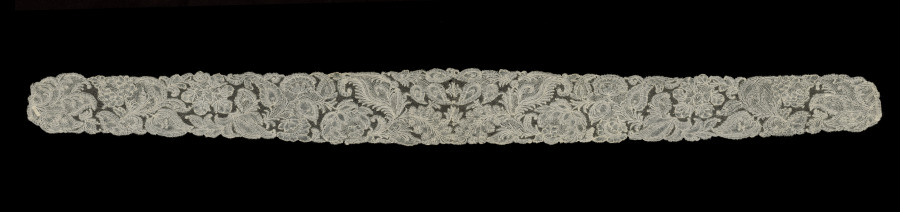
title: Lace Lappet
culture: Belgium, Brussels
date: 1700s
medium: Linen: bobbin lace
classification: Lace